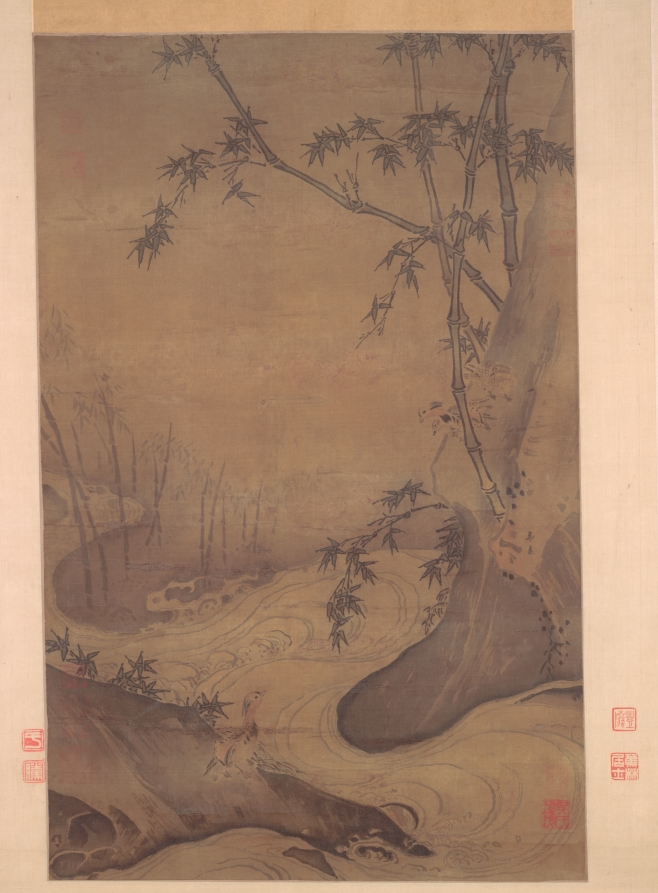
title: Bamboo and Ducks by a Rushing Stream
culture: China, Southern Song dynasty (1127–1279)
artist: Ma Yuan (Chinese, c. 1150–after 1255)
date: 1127–1279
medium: hanging scroll; ink and light color on silk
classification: Painting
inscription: 馬遠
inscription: 12 additional seals: 1 of An Kuo (1481–1534); 7 of Hsiang Yüan-pien (1525–1590); 2 of Liang Ch'ing-piao (1620–1691); 2 unidentified. (WKH)